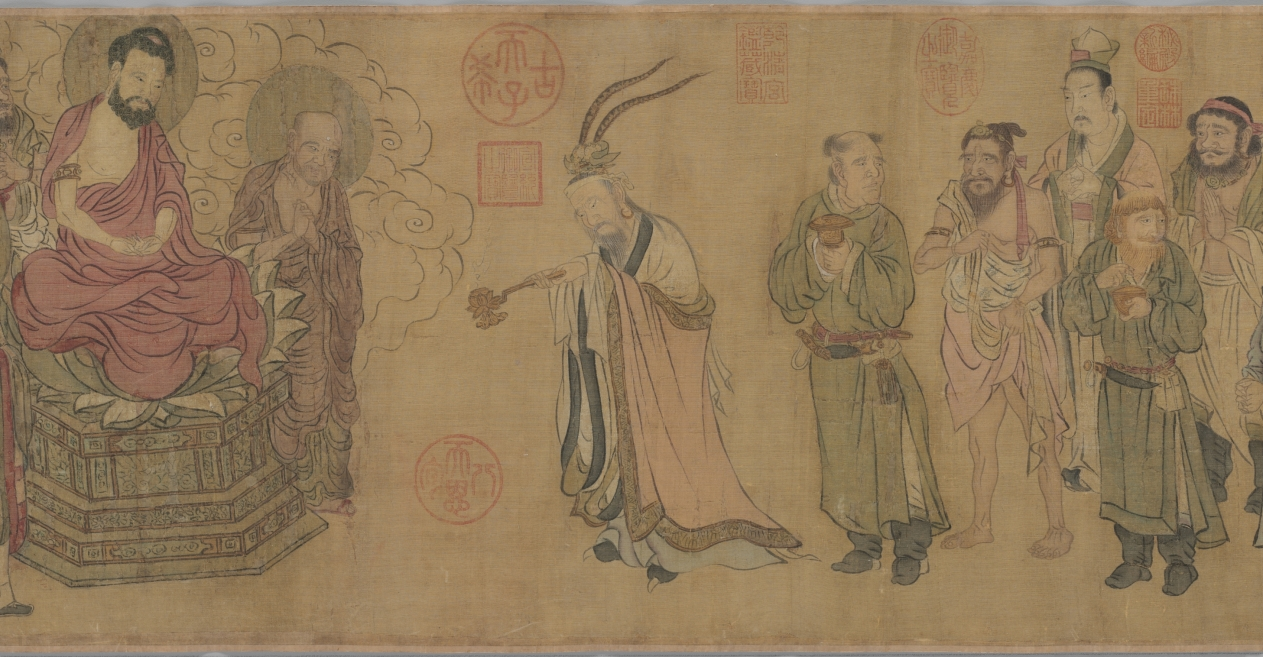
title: Barbarian Royalty Worshiping the Buddha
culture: China, Northern Song dynasty (960-1127)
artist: attributed to Zhao Guangfu (Chinese, c. 923–976)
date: 900s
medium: Handscroll; ink and color on silk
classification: Painting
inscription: 佛法入中國千餘年。殆是家有其像。見之者悉起敬心，不當以古今畫手分別也。 子昂 [印]趙氏子昂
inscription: Colophon by Guo Bi (1280–1335): A transcription of "Zheng fa yan zang ming bing xu" 正法眼藏銘幷序 by Wuwei Jushi 無為居士. Signature: Situi Jushi Guo Bi 思退居士郭畀. 2 seals.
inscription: Spurious artist's signature: Zhao Guangfu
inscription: 1 seal of the Li family (Yuan Dynasty)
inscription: 14 seals of Qianlong Emperor (r. 1736–95)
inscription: 1 seal of Jiaqing Emperor (r. 1796–1820)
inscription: 1 seal of Xuantong Emperor (r. 1909–11)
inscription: 1 official seal of the Yuan dynasty, “Tian li zhi bao 天曆之寶” (Treasure of Tianli).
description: This painting begins on the right with 15 people following a dignified figure wearing headgear with twin pheasant feathers. He extends an incense burner toward the Buddha, who is seated on his lotus throne and flanked by two haloed disciples and two Heavenly Kings. The worshipers’ diverse physical features, regional finery, and religious affiliations suggest the universal appeal of Buddhism. The imagery was inspired by the foreign envoys who frequently came to the Chinese court to give tribute to the emperor. At the time, all outsiders were considered “barbarians,” so their presence was seen as acknowledgment of China’s political and cultural power.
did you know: Sixteen "barbarians" pay homage to the Buddha, who is seated on a lotus throne with two disciples and two guardians.